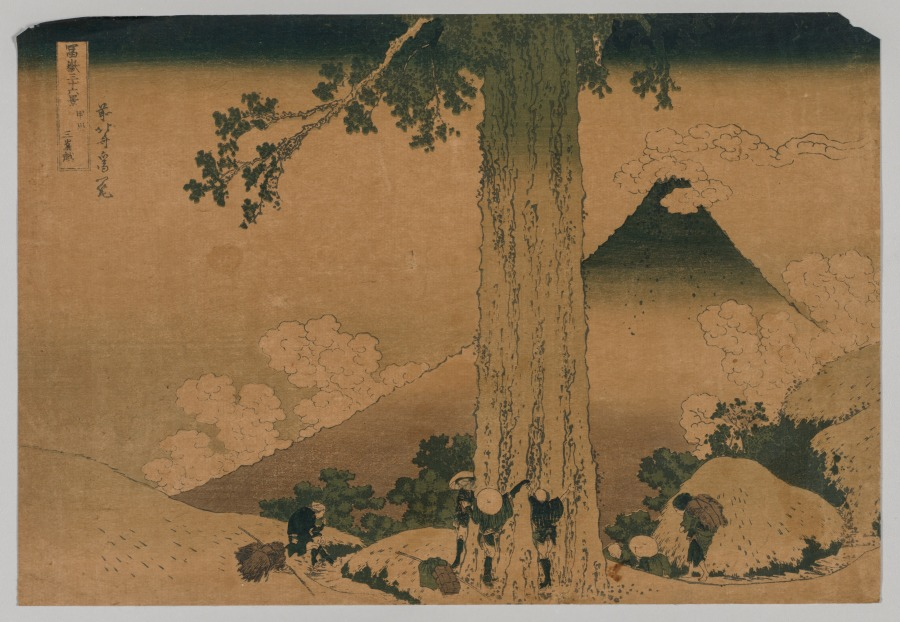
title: Fuji from the Pass of Mishima, Koshu Province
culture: Japan, Edo period (1615–1868)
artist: after Katsushika Hokusai (Japanese, 1760–1849)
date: 1760–1849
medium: color woodblock print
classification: Print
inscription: Signature: Zen Hokusai I-itsu fude